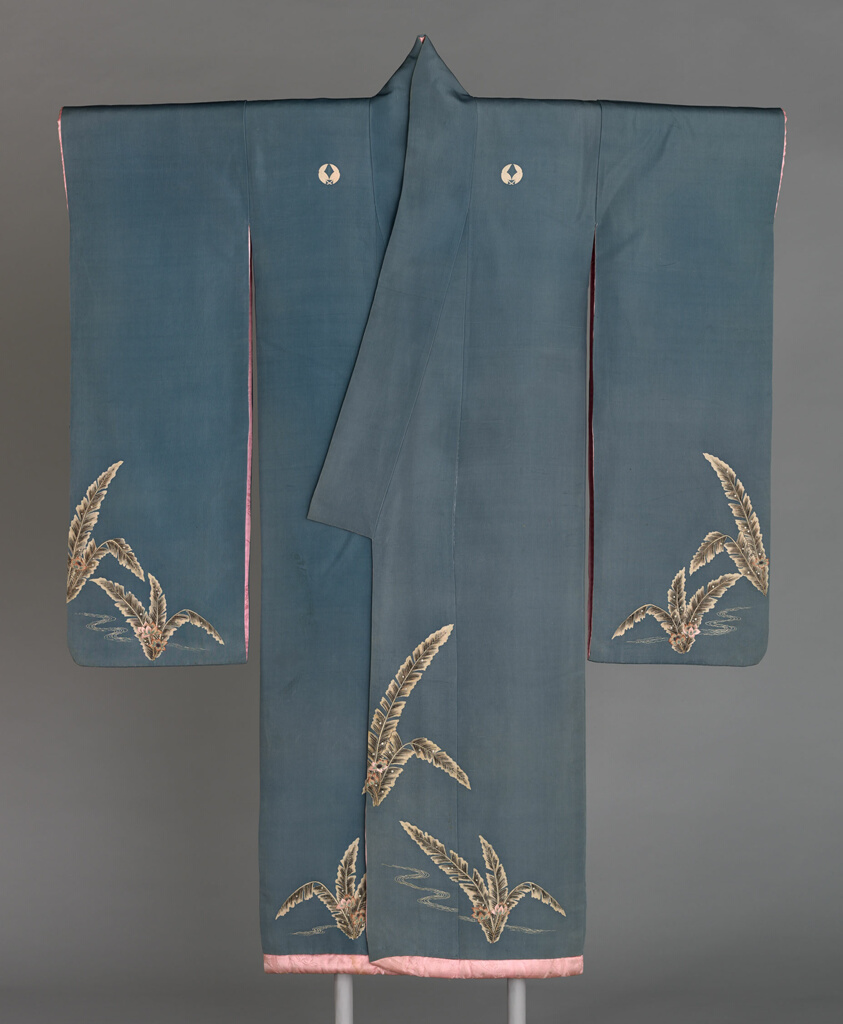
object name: Textile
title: Furisode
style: meiji, Japanism, East Asian, asian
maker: Japan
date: Meiji period (1868–1912), c. 1890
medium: Silk, plain weave (shioze); resist dyed (tsutsugaki and hikizome) and painted with pigment and silver; embroidered with silk and gold-leaf-over-lacquered- paper strip in satin and single back stitches; lined with silk, satin damask weave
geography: Japan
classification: textile; weaving - printed